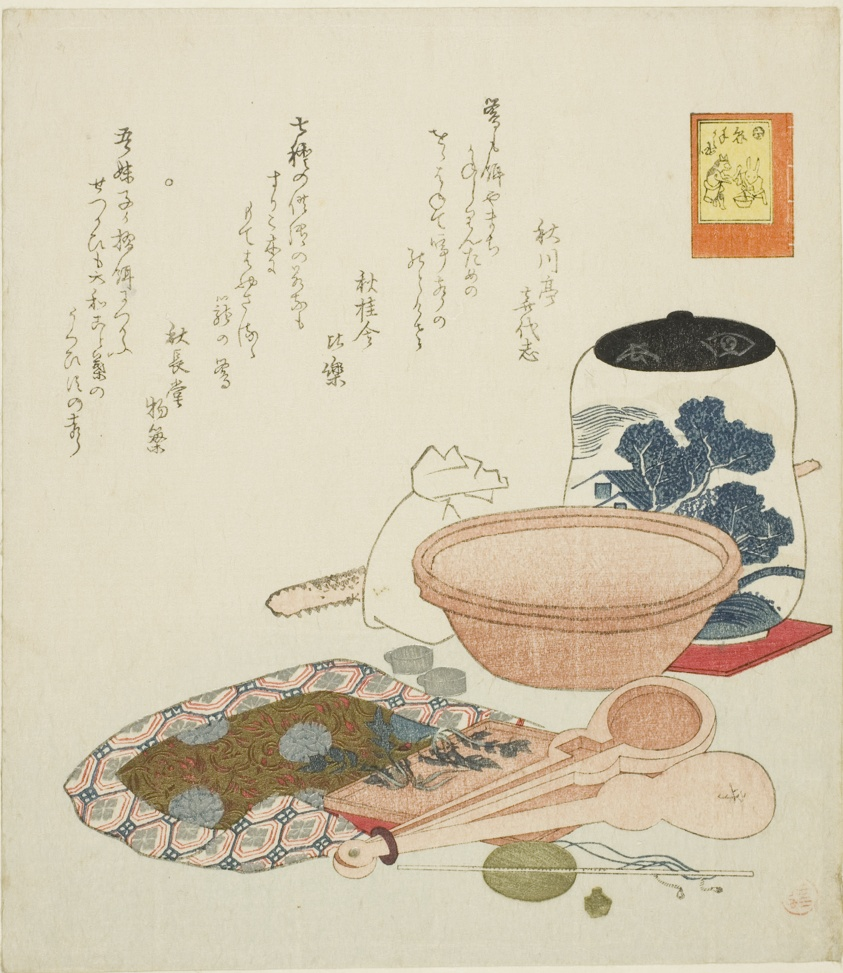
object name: Print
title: Jar, scales and bowl, no. 6 from the series "The Rabbit's Boastful Exploits (Usagi tegarabanashi)"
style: Japanese (culture or style)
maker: Ryuryukyo Shinsai (Japanese, c. 1764-1820)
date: 1819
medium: Color woodblock print; shikishiban, surimono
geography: Japan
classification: woodblock print; print; asian art